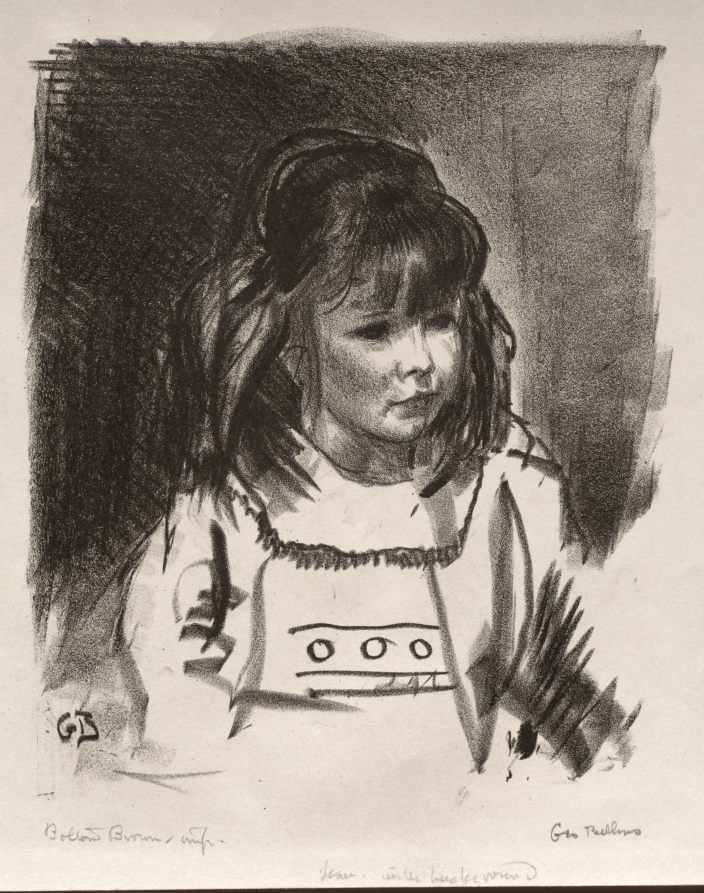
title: Jean 1921, Second Stone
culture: America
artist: George Bellows (American, 1882–1925)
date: 1921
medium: lithograph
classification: Print